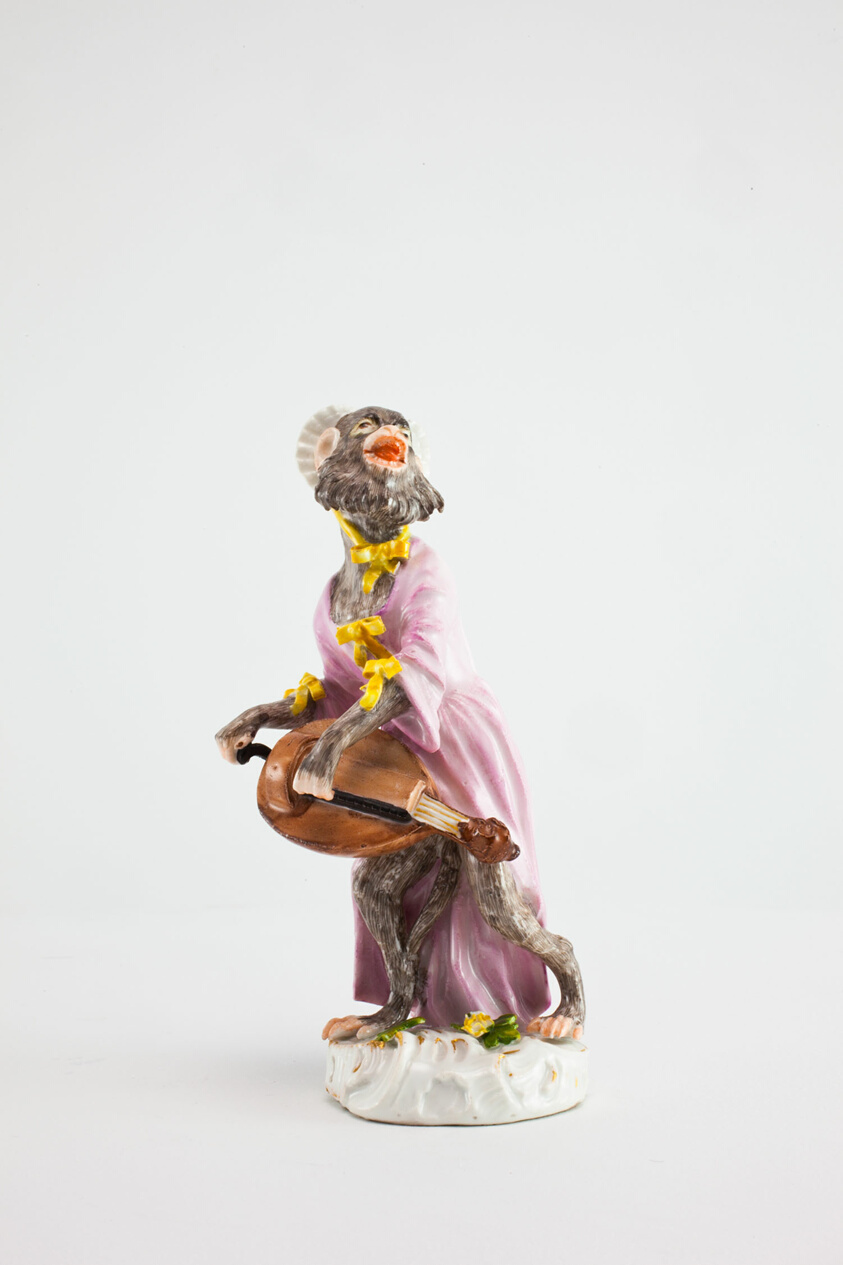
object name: Ceramics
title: Hurdy-Gurdy Player for the Monkey Band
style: Rococo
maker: Meissen Porcelain Manufactory; German, founded 1710; After a model of Kändler or Reinicke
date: c. 1765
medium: Hard-paste porcelain, polychrome enamels, and gilding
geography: Meissen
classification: sculpture; ceramics; porcelain; european decorative arts